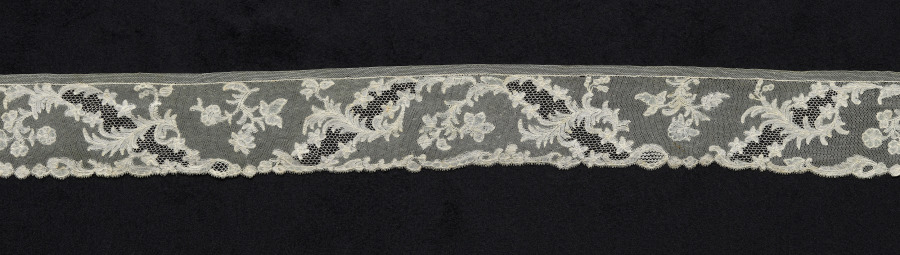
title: Lace Edging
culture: Belgium, Brussels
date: 1700s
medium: Linen: bobbin lace (Point d'Angleterre)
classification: Lace